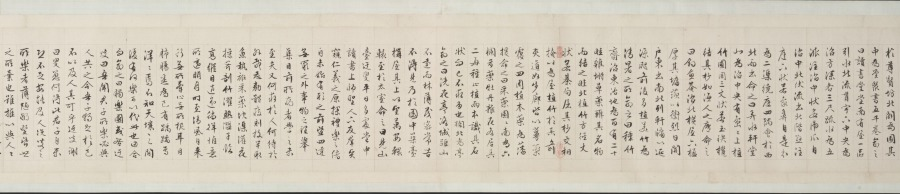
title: Garden for Solitary Enjoyment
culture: China, Ming dynasty (1368–1644)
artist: Qiu Ying (Chinese, 1494–1552)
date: 1515–52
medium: Handscroll; ink and light color on silk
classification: Painting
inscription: Accompanying text of an essay together with seven poems of Sima Guang (1019–1086) and one poem of Su Shi (1037–1101) written by Wen Zhengming (1470–1559) in 1558.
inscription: 2 colophons and 82 seals: 4 seals of Wen Zhengming 文徵明 (1470–1559); 59 seals of Xiang Yuanbian 項元汴 (1525–1590); 1 colophon, dated 1644, and 7 seals of Xiang Yukui 項禹揆 (c. late 1500s–1659); 1 colophon, dated 1880, and 2 seals of Weng Tonghe 翁同龢 (1830–1904); 2 seals of Ch'eng Chen-i (19th c.); 1 seal of Han Ch'ung (19th c.); 4 seals of Wan-go H. C. Weng 翁萬戈 (1918–2020); 3 seals unidentified.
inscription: Colophon by Xiang Yukui 項禹揆 (c. late 1500s–1659): The painting of The Garden for Self-enjoyment on the right by Shih-chou, Mr. Qiu [Qiu Ying] is in the style of Li Lung-mien. Its mood is peaceful, as if meeting the ancient gentlemen face to face among the brushes and silk; it lifts one above the sordid bustle of life. Formerly, my late father handed me this scroll which had only the painting without the written essay. I considered asking a good calligrapher to write the essay to add to it but was afraid that the quality of the writing would not match the painting. Several years later, I saw at a friend's house this essay and poems (of Ssu-ma Kuang] written by Hengshan [Wen Zhengming], once owned by my grandfather; so I spared no expense to obtain it. I rejoiced at this and said: "The divine swords are finally united. How things are pre-destined!" Now my friend Chang Kung-chao's technique for mounting [painting and calligraphy] is excellent. Therefore by daring to take them out and join them together, I can preserve this beautiful story of singular reunion. Xiang Yukui recorded at Hai-yeh-t'ang [hall] two days before New Year's Eve in the jiasheng year of the Chongzhen era [1644]. trans. LYSL/HK/WKH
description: Garden of Solitary Enjoyment refers to a site built in 1073 by the statesman Sima Guang (1019–1086) after he had retired to Luoyang, Henan province. Every spring, visitors would flock to his garden. Each of its seven structures references a historic figure. Sima wrote: I channel streams [like Du Mu], to water flowers [like Bai Juyi], or trim bamboo [like Wang Huizhi]. . . . I know of no joy between heaven and earth that could take its place. Qiu Ying’s painting, created after an 11th-century version of the same theme, must have appealed to garden owners of the Ming dynasty, since it became the template for numerous Suzhou workshop copies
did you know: Sima Guang completed his monumental survey of Chinese history, Zizhi tongjian, in the garden depicted in this painting.